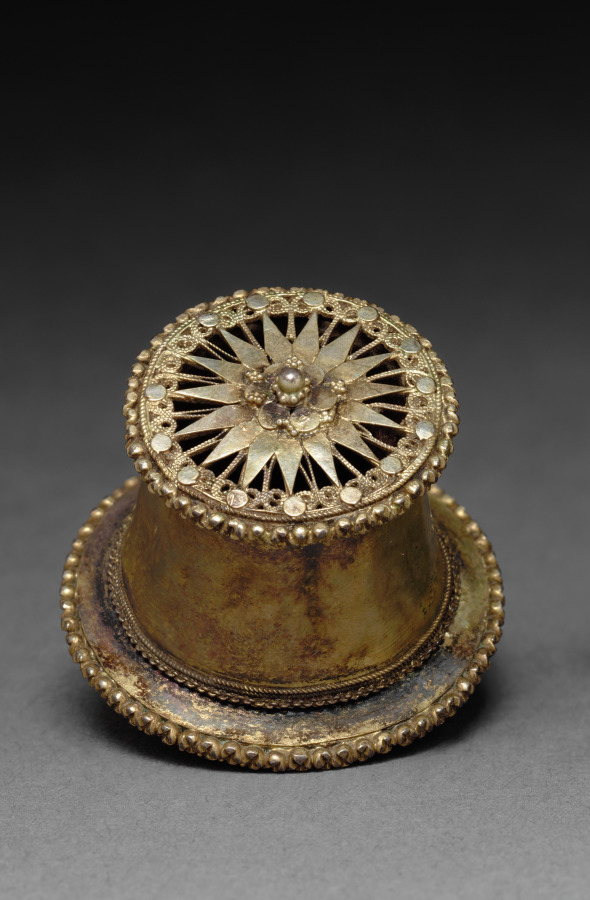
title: Earring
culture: Burma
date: 1800s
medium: silver gilt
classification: Jewelry